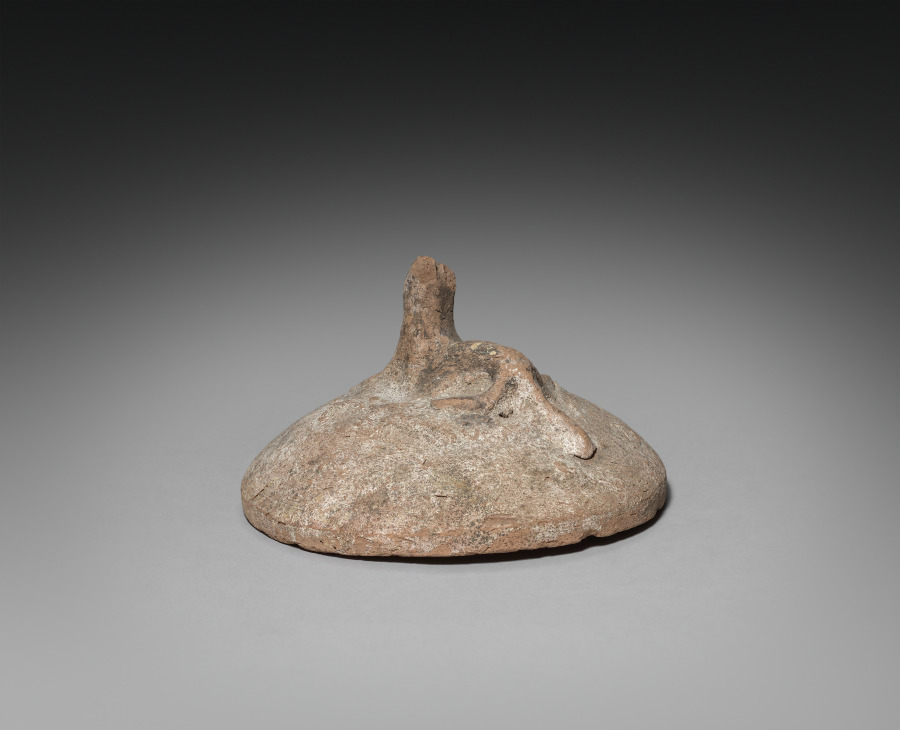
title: Shawabty Jar with Lid (lid)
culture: Egypt, New Kingdom (1540–1069 BCE), Dynasties 19–20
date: 1295–1069 BCE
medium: Nile silt ware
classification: Funerary Equipment